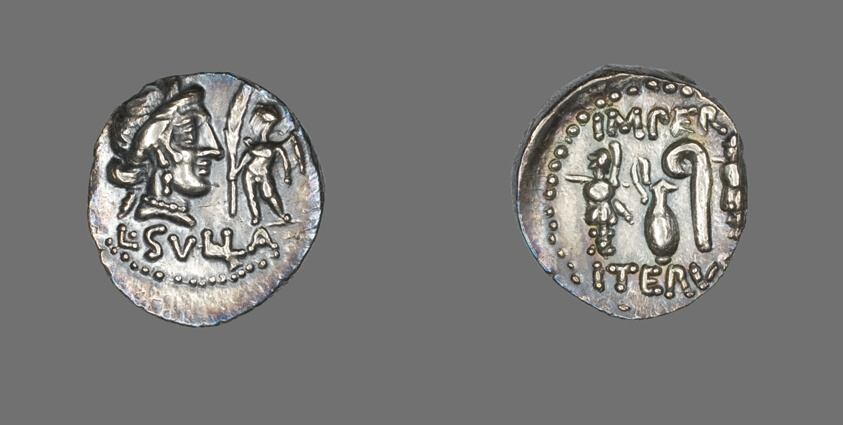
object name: Coin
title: Denarius (Coin) Depicting the Goddess Venus with Cupid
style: roman (ancient, style or period), ancient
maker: Roman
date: 84-83 BCE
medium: Silver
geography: Roman Empire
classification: coin; ancient art